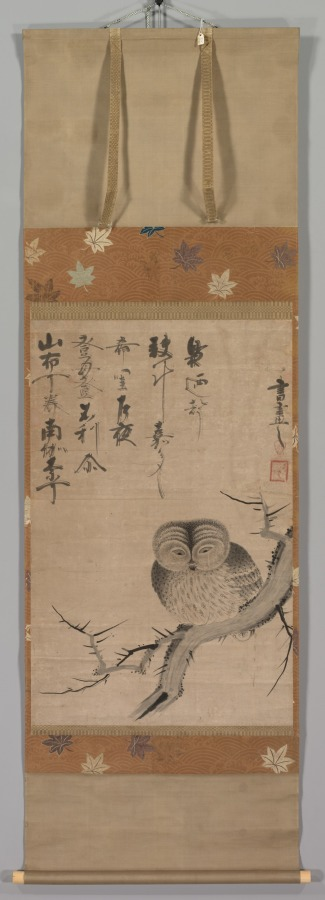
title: Owl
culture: Japan, Edo period (1615–1868)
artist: Tsuda Bensaku (Japanese, active 1620s–40s)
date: 1630s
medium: hanging scroll; ink and slight color on paper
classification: Painting